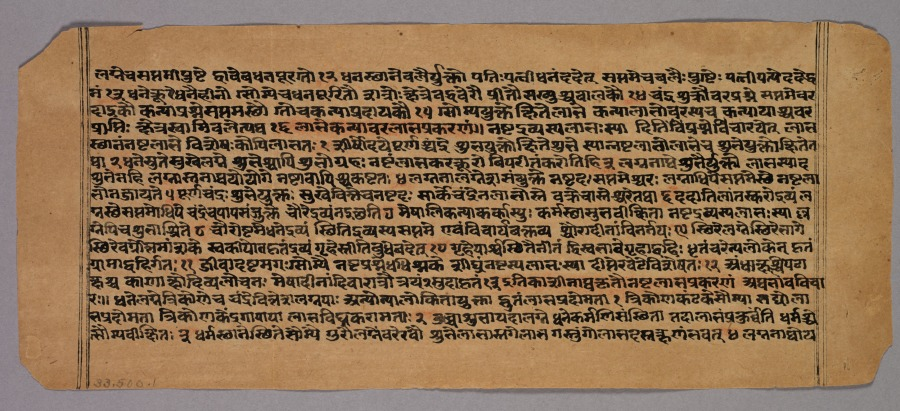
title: Page from the Prasnapradipa, a Hindu Astrology Text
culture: Western India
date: 1500s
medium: ink on paper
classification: Manuscript